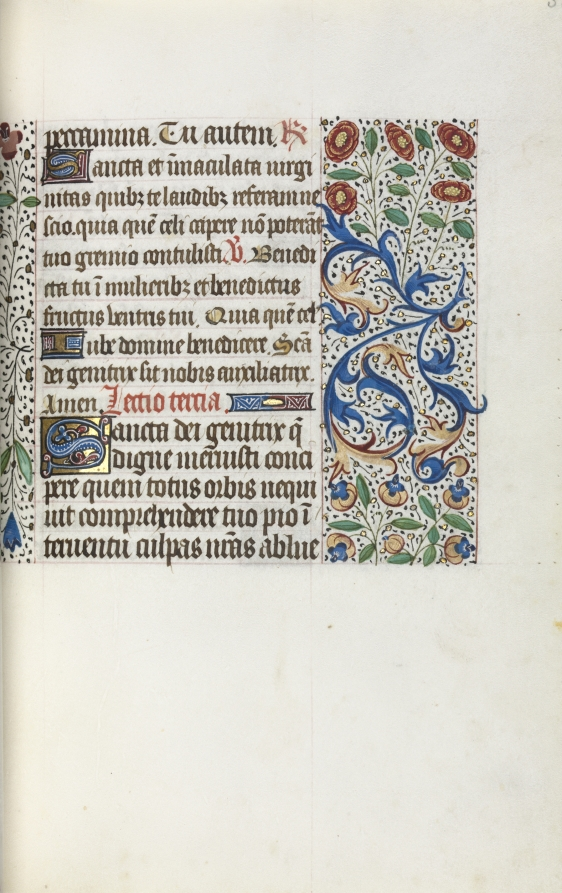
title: Book of Hours (Use of Rouen): fol. 36r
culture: France, Rouen, 15th century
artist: Master of the Geneva Latini (French, active Rouen, 1460–80)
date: c. 1470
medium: ink, tempera, and gold on vellum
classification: Bound Volume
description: In the late 1400s and early 1500s Rouen was an established and important center of book production. The city’s cathedral had a wealthy chapter that spent large sums of money to commission books and to maintain its extensive library. The stationers and booksellers would have likely been concentrated in or near the cathedral precinct. This artist, named after a manuscript now in Geneva, was Rouen’s principal illuminator during the second half of the 1400s.